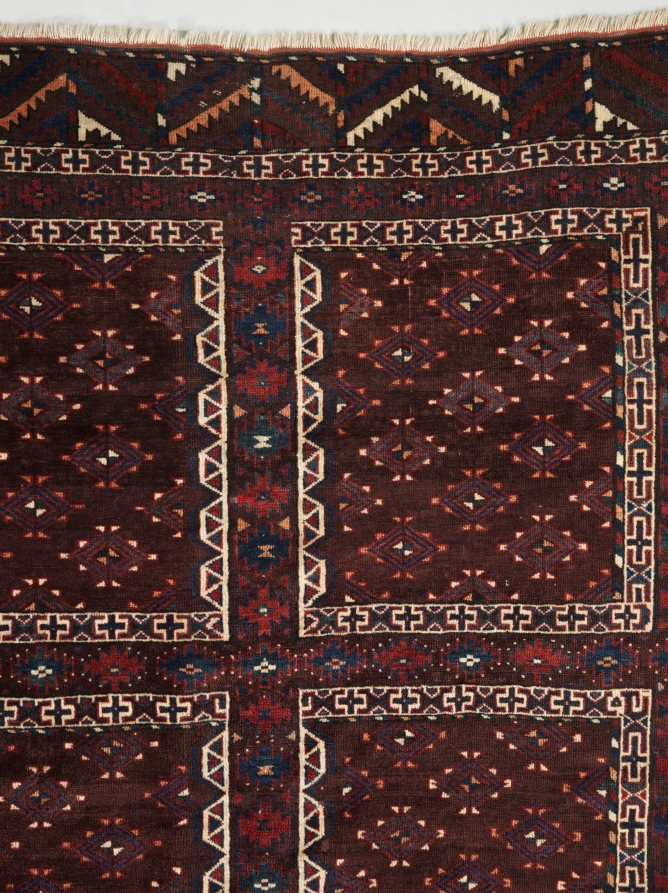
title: Door Rug (Ensi)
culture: Turkmenistan, Yomud, 19th century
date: c. 1900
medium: knotted pile, asymmetrical knot, 117 knots psi; wool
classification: Carpet